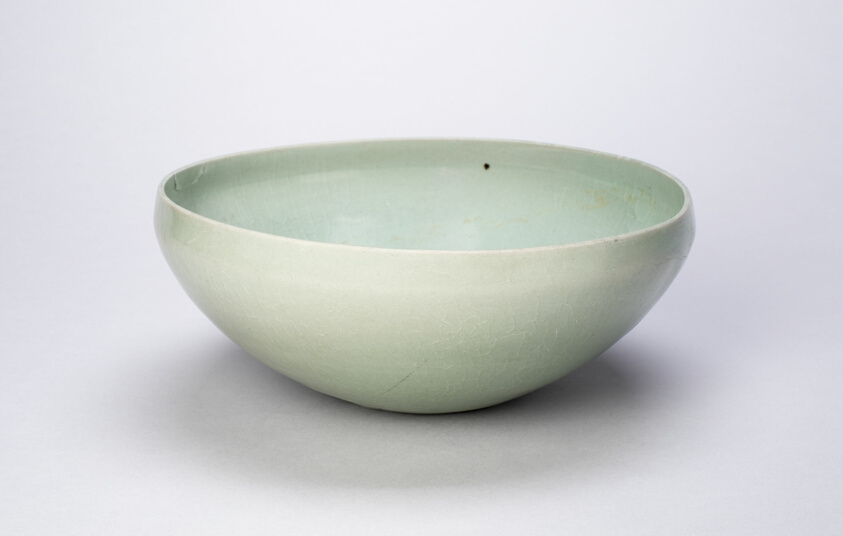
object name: Vessel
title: Monk's Bowl (Baru)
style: Korean (culture or style)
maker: Korea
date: Goryeo dynasty (918–1392), 12th century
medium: Stoneware with celadon glaze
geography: Korea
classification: bowl; porcelain; dish (vessel); asian art; ceramics; vessel